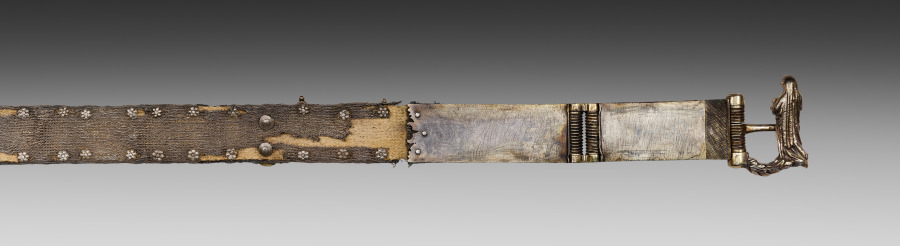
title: Belt for a Lady's Dress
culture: Italy, Siena(?)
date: c. 1375–1400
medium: basse-taille enamel and gilding on silver, silver thread, gilt-silver buckle, cast and chased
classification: Jewelry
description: Because of its extraordinary richness, this belt (also known as a girdle) was both an ornament for the body and an object of great personal luxury. Almost eight feet in length, belts like this were at the height of fashion for both men and women. After being passed around the waist and through the buckle, one end of the belt would fall to the hem of the garment. The belt's many colorful enamel plaques are worked in translucent enamel over decoration engraved into the silver beneath (an enameler's technique known as basse-taille). Within the plaques and cast into the buckle are scenes of courtly love, musicians, and fantastic animals. A large number of translucent enamels were made for secular objects during the late Middle Ages for use on jewelry, cups, garment clasps, and similar objects. This belt is a rare survival among these now scarce objects.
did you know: Look closely at the tiny scenes of courtly love on the plaques that adorn this belt. Given their size, these scenes were designed for the enjoyment of the woman who wore this belt over a sumptuous dress rather than an admirer from a distance.